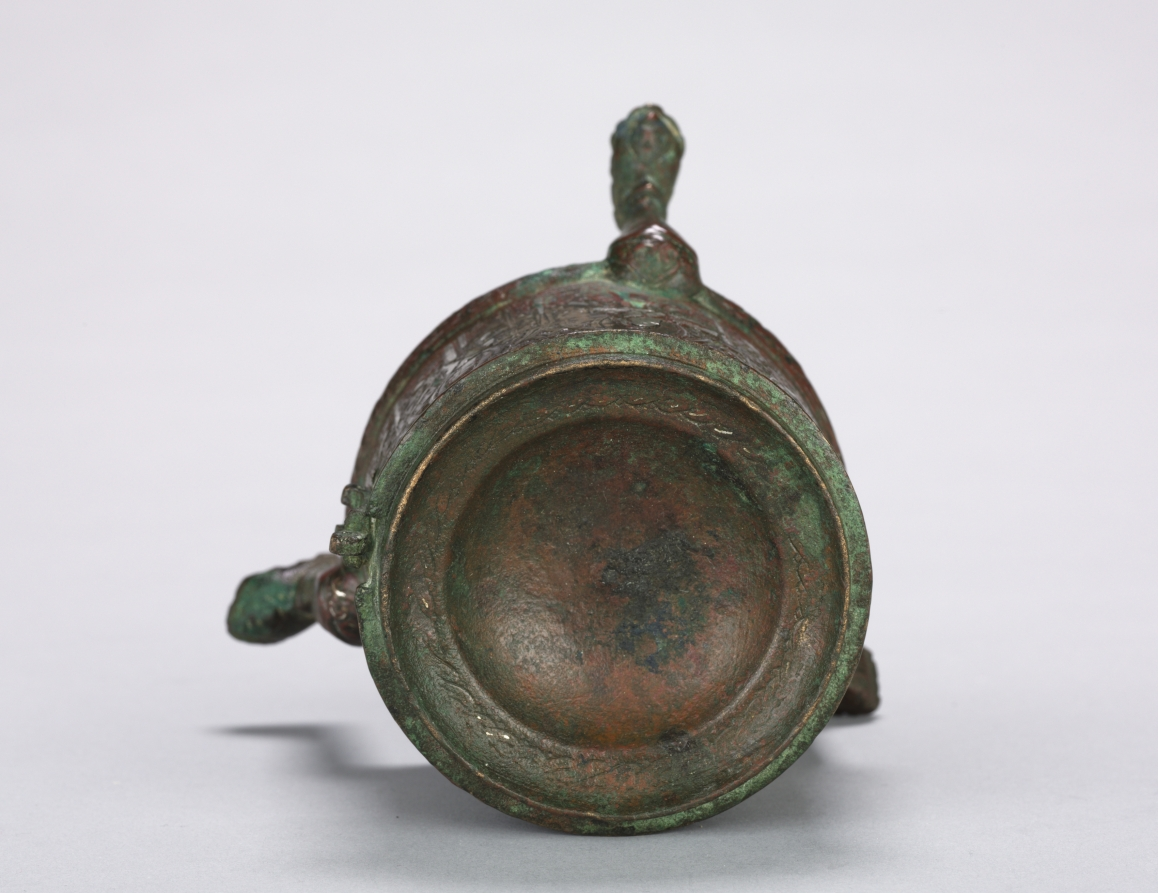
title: Incense Burner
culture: Syria, Ayyubid Period, 13th Century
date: 1200–1250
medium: brass inlaid with silver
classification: Metalwork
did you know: This footed vessel is wearing shoes.